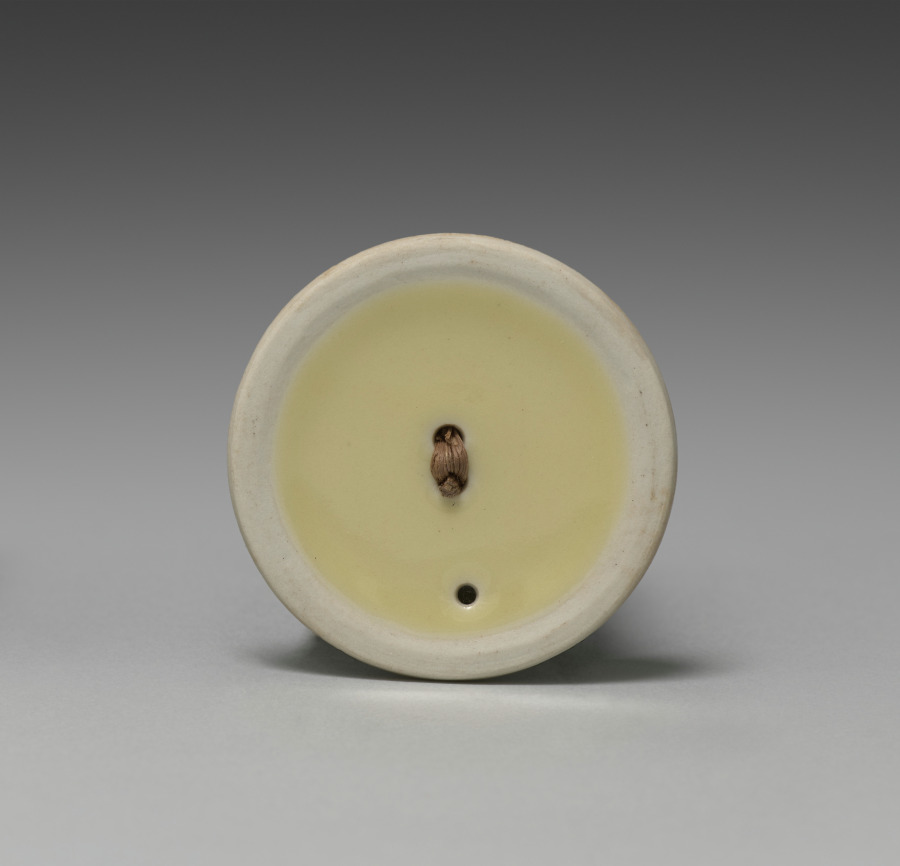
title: Lid for a Sake Pourer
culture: Japan, Taishō period (1912–26) or Shōwa period (1926–89)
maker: Seifū Yohei IV (Japanese, 1872–1951)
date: 1914–46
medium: Porcelain with yellow glaze and bamboo lid handle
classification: Ceramic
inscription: 清風造 。 【印】 清風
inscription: 成山清風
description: Like his father, Yohei IV also produced works with red or yellow monochrome glazes. His yellow-glazed works include this pair of sake pourers, a set of five drinking cups CMA 2022.217, and a sweets bowl molded into the shape of a chrysanthemum CMA 2022.218.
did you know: The lid's handle is made of bamboo.